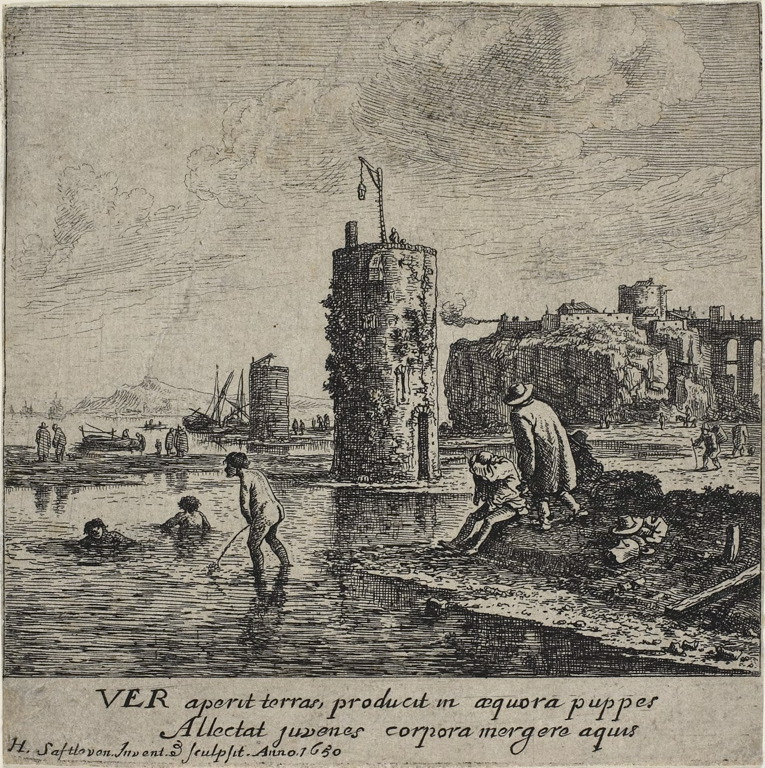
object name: Print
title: Spring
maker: Saftleven Herman II; Dutch, 1609-1685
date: 1650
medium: Etching on ivory paper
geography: Netherlands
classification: etching; print; prints and drawing